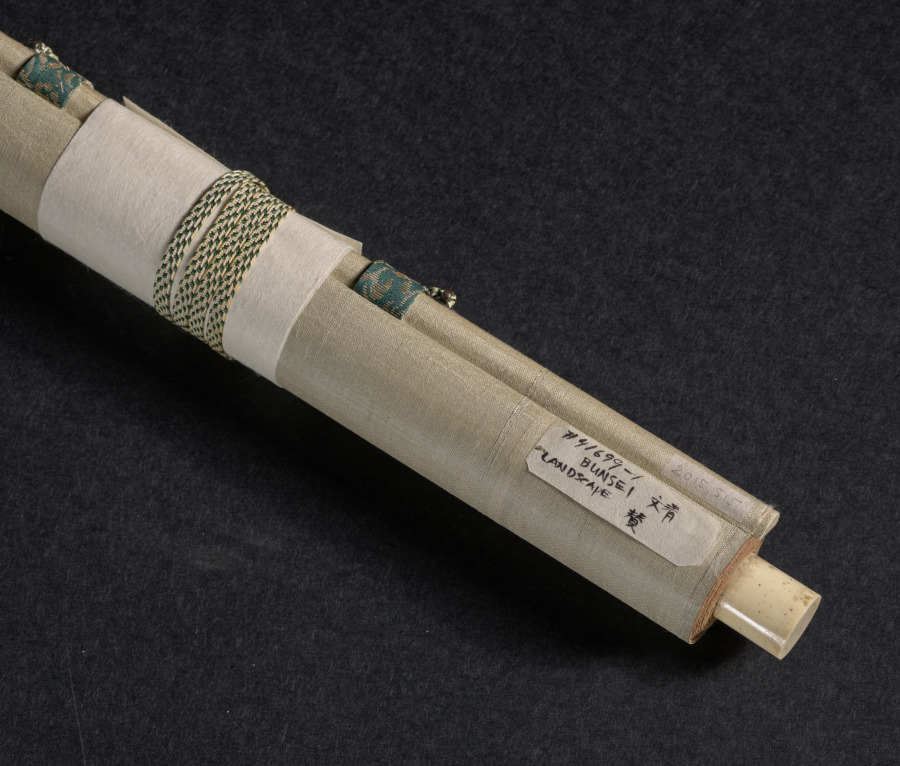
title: Shuyadō (Studio of Lofty Rusticity)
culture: Japan, Edo period (1615–1868)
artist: after Bunsei (Muncheong) (Japanese or Korean, active mid-15th century)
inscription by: after Chikuan Daien (Japanese, 1362–1439)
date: 1700s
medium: hanging scroll, ink on paper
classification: Painting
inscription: inscription by Chukuan Daien (Japanese, 1362-1439)m dated 1435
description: Hanging scrolls with assorted poems above and ink paintings below produced within Japan's Zen monastic community during the 1400s and 1500s are called poem-painting scrolls (shigajiku). This small painting was created much later in emulation of such works. While the original works often have a preface followed by poems by different monks, this composition has only a preface.